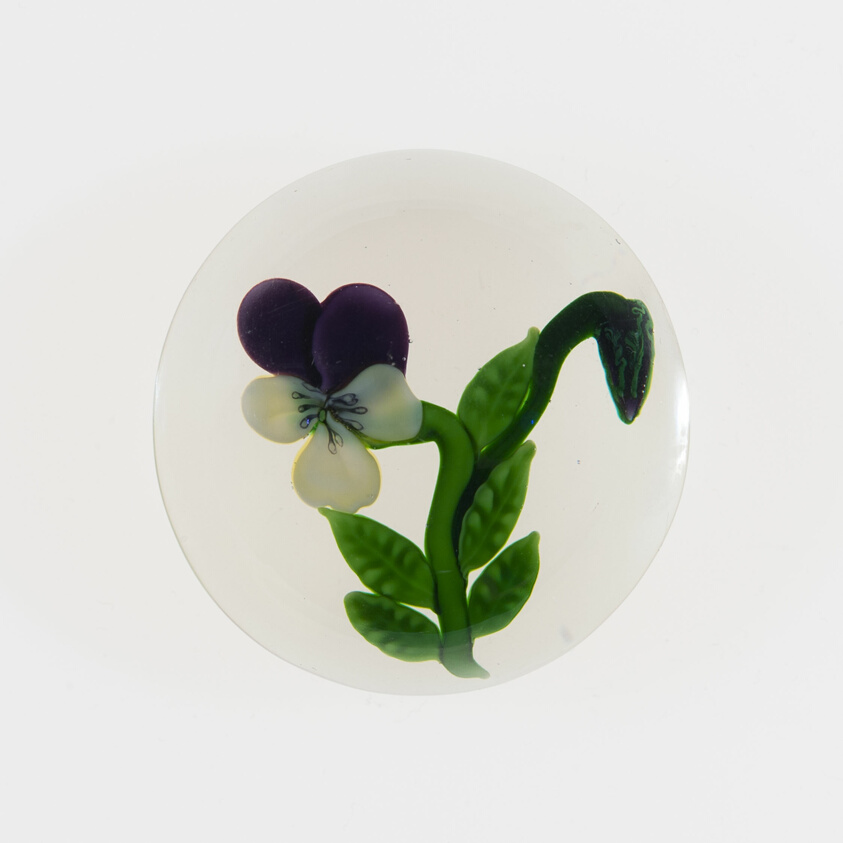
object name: Glass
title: Paperweight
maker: Clichy Glassworks (Cristalleries de Clichy); Clichy, France, 1837-1885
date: 19th century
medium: Glass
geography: Clichy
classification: paperweight; lampwork; european decorative arts; glass